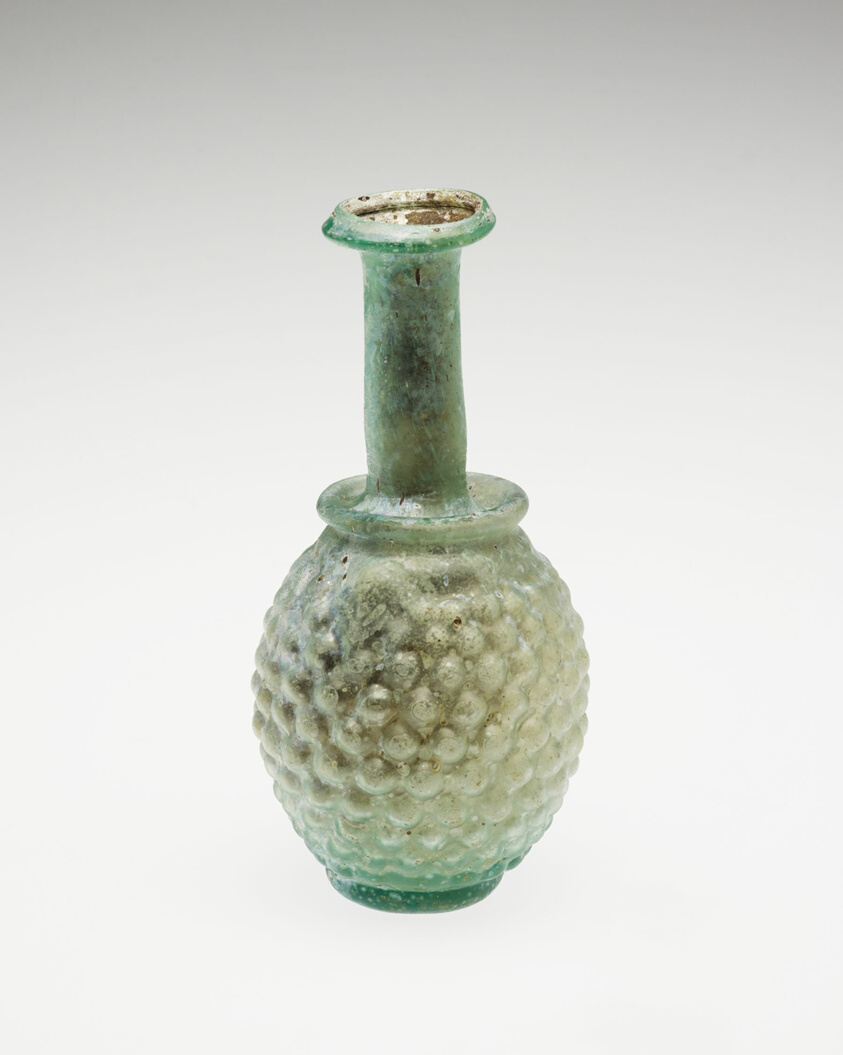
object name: Vessel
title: Bottle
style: syrian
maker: Roman; Syria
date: probably 3rd century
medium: Glass, mold-blown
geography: Syria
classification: bottle; glass; vessel; ancient art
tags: containers